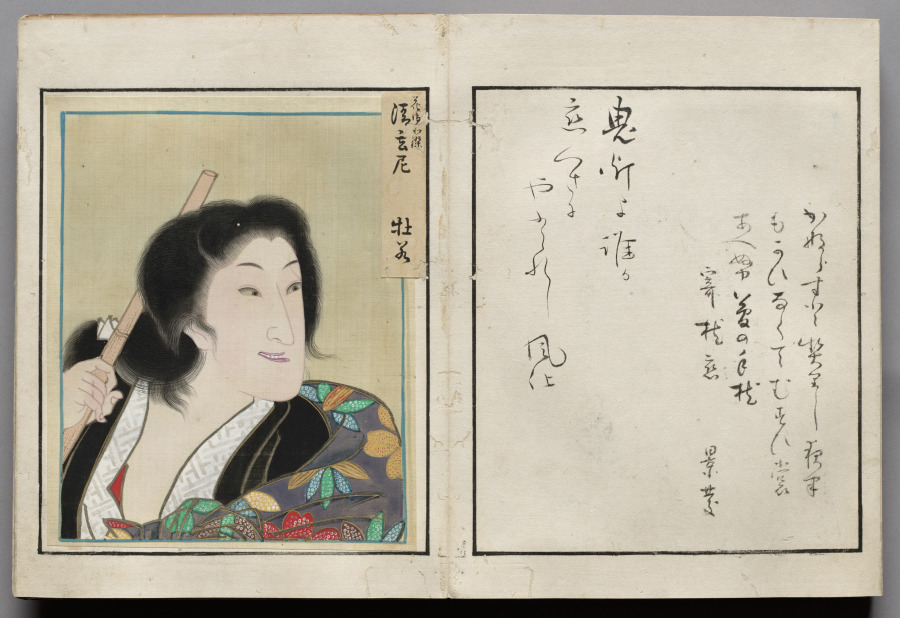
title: Double-Leaf from Album of Actor Portraits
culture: Japan, Edo period (1615–1868)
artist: Shōrakusai (Japanese)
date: c. 1790–1810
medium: double-leaf from an accordion-style album; ink on paper (right), and ink and color on silk (left)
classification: Bound Volume